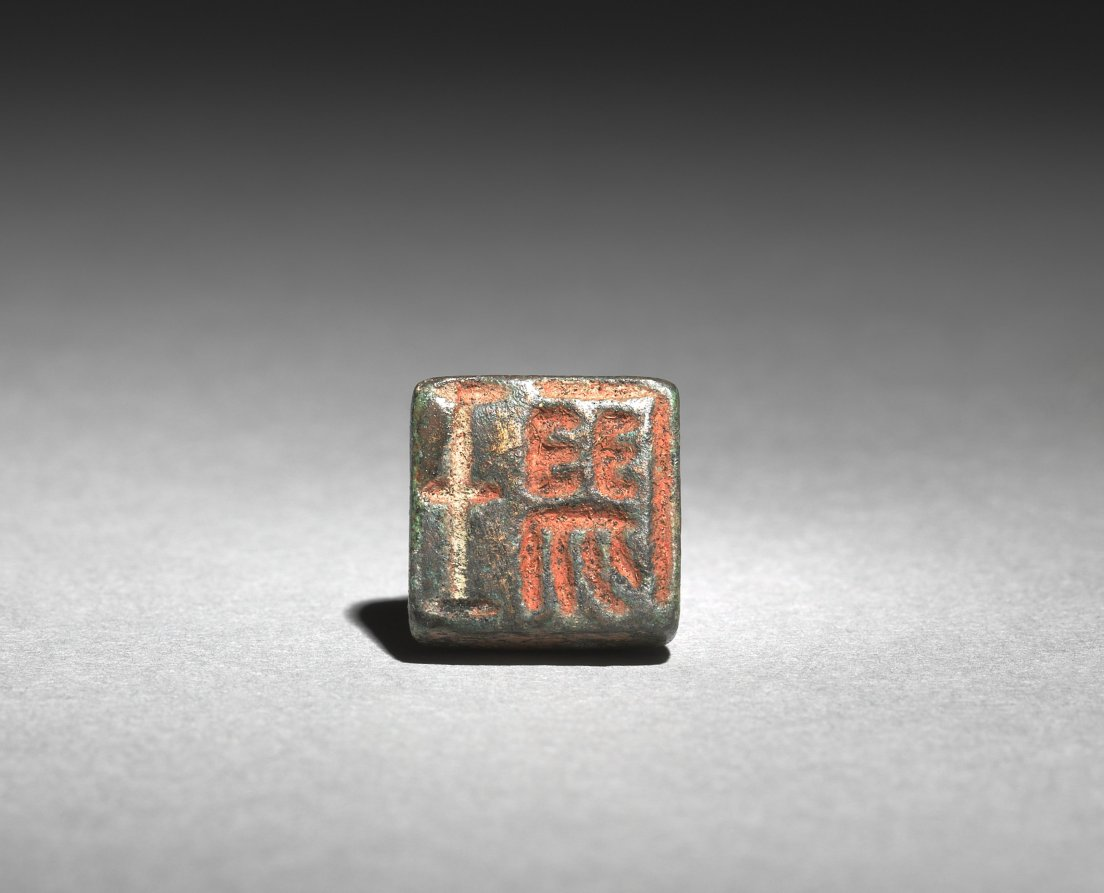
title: Seal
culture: Korea, Goryeo dynasty (918–1392)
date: 1100s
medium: bronze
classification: Metalwork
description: A large quantity of bronze seals were excavated from tombs of the Goryeo dynasty. This seal bears two inscribed characters: 王 (king) and the other illegible. The red cinnabar paste is still visible, indicating it must have been used for signing various documents while its owner was alive.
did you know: A large quantity of bronze seals excavated from tombs of the Goryeo dynasty is closely related to the development of metallurgy in 13th-century Korea that allowed the transition from wood type to movable metal type printing.